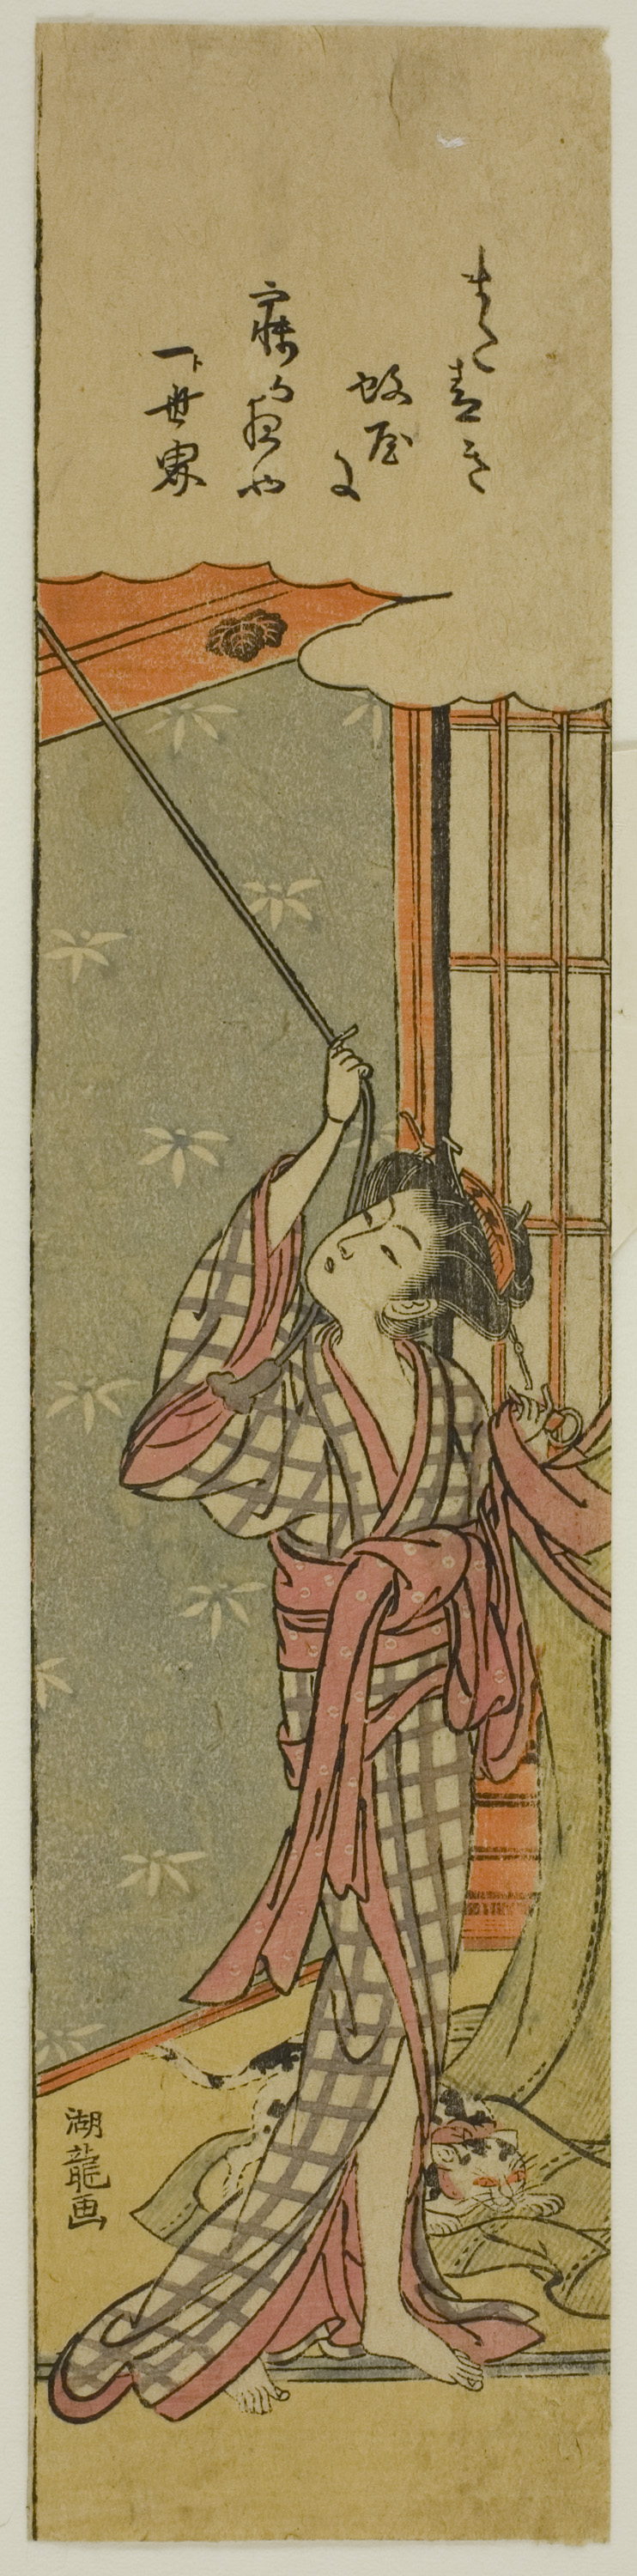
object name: Print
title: Young Woman Hanging a Mosquito Net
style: Japanese (culture or style)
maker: Isoda Koryusai (Japanese, 1735-1790)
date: c. 1775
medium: Color woodblock print; tanzaku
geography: Japan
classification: woodblock print; print